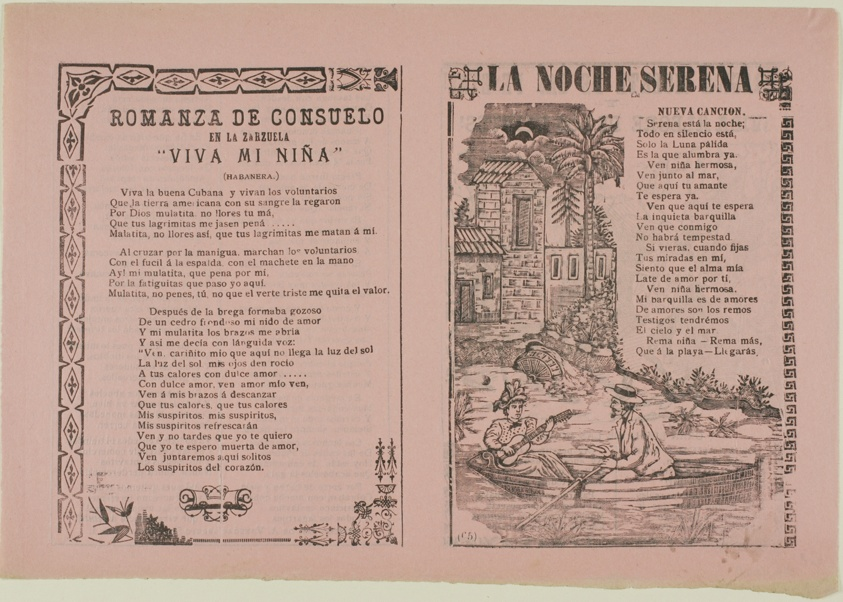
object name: Print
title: The Calm Evening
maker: Manuel Manilla (Mexican, 1830-c.1900)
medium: Double-sided relief engraving on typemetal on paper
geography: Mexico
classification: woodcut; print; prints and drawing